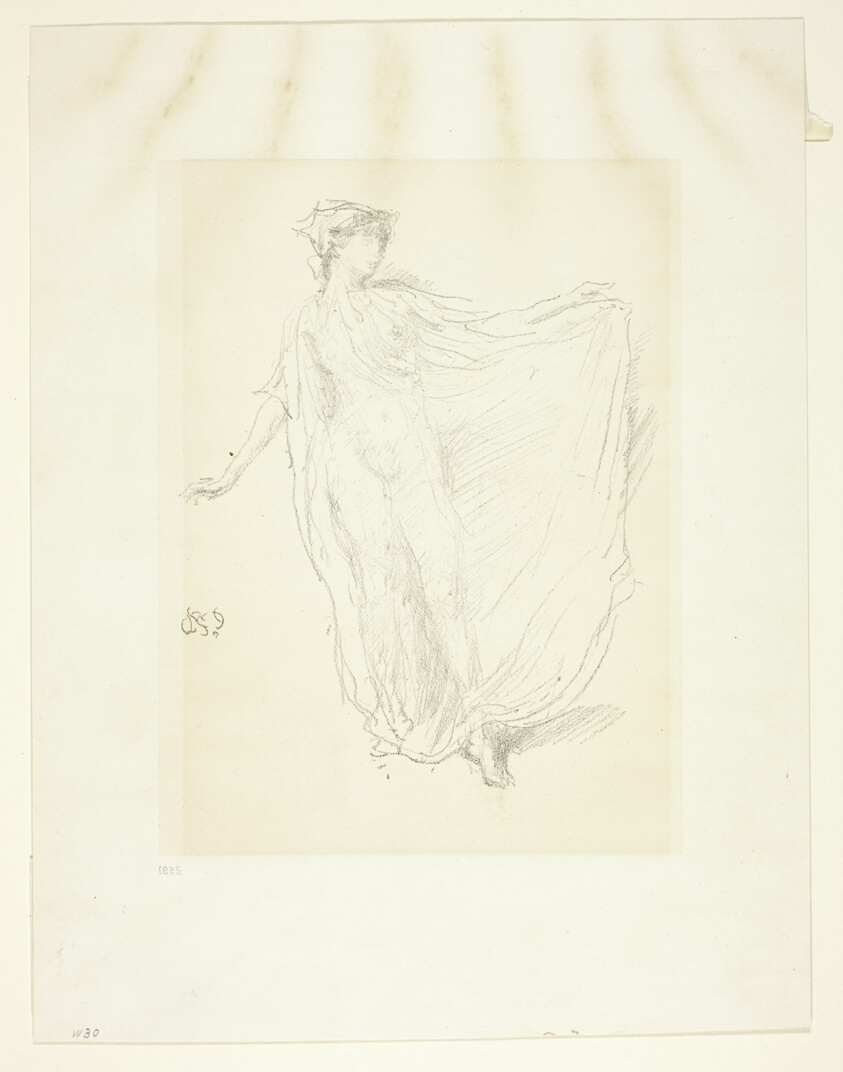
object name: Print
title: The Dancing Girl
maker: James McNeill Whistler (American, 1834-1903)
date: 1889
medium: Transfer lithograph in black on cream chine, laid down on ivory plate paper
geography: United States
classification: transfer lithograph; lithograph; print; prints and drawing; paper